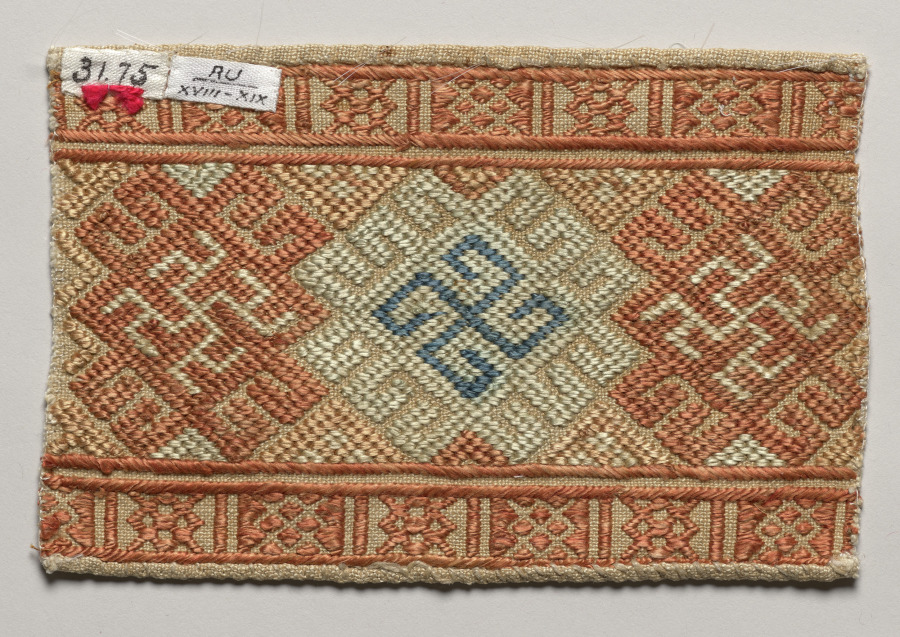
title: Panel for a Headdress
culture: Russia, Tambov province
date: 1700–1900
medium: Linen: plain weave; silk: embroidery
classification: Embroidery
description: This Russian embroidered panel was used to embellish a headdress. Textiles of this type are valuable for their embroidery depicting ancient folk motifs, ritual significance, exemplification of the role of textiles in Russian society, and connection to a prominent woman collector, Natalia de Shabelsky, without whom this textile and others like it might have been lost.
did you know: Embroidery was a common tradition in many cultures because it displayed the skill of the mother or daughter who stitched the embroidery.